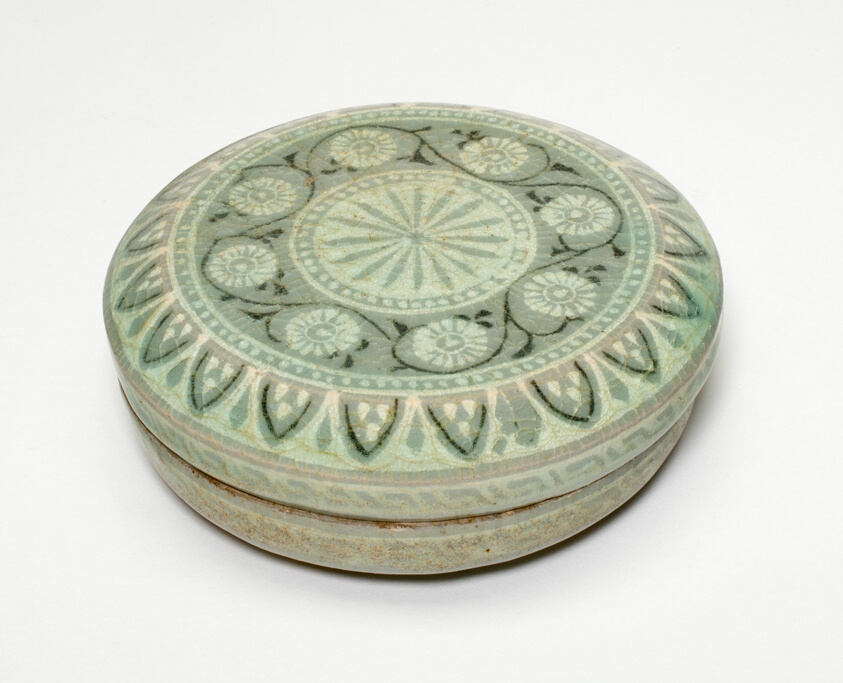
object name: Decorative Arts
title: Covered Cosmetic Box with Chrysanthemum Flower Heads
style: Korean (culture or style)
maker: Korea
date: Goryeo dynasty (918–1392), mid–13th century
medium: Celadon-glazed stoneware with underglaze inlaid decoration of black and white clays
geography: Korea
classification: stoneware; asian art; ceramics; decorative arts